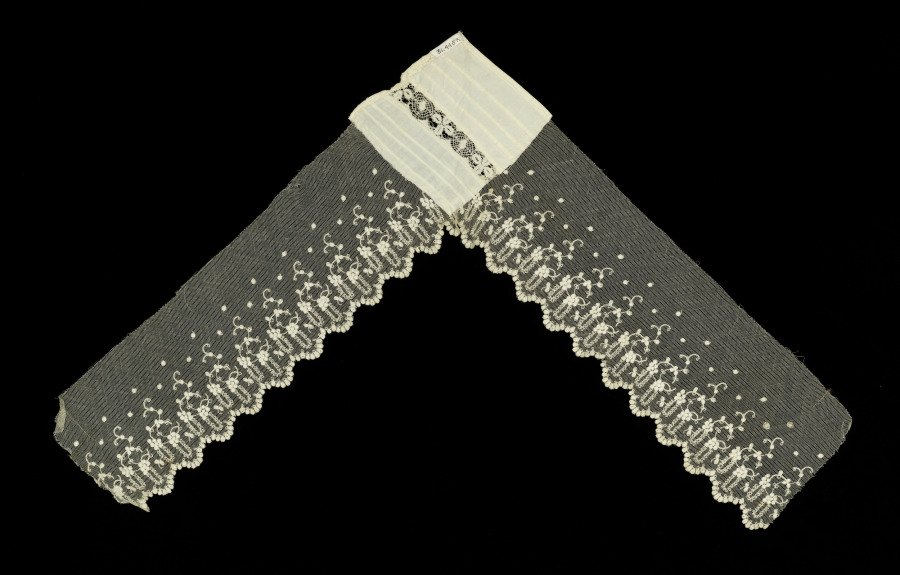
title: Woman's Costume (Machine-Made Lace for Neck)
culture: Italy, Sicily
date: 1800s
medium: Machine-made net lace, embroidered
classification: Garment